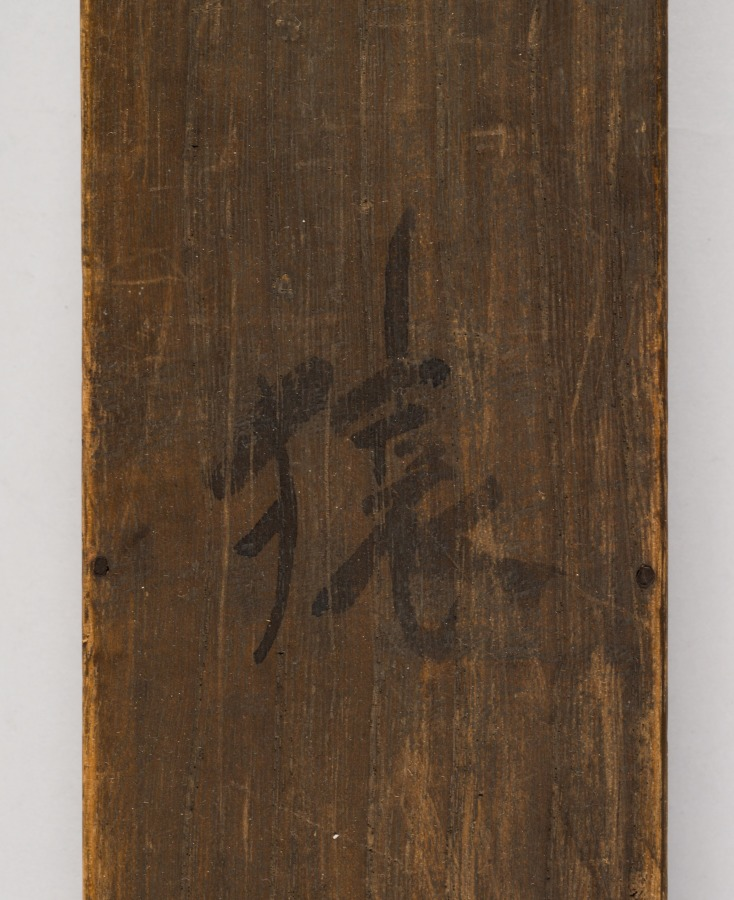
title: Monkeys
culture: Japan, Edo period (1615–1868)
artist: Gyokutei Katsu (Japanese)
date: c. 1800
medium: hanging scroll; ink on paper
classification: Painting